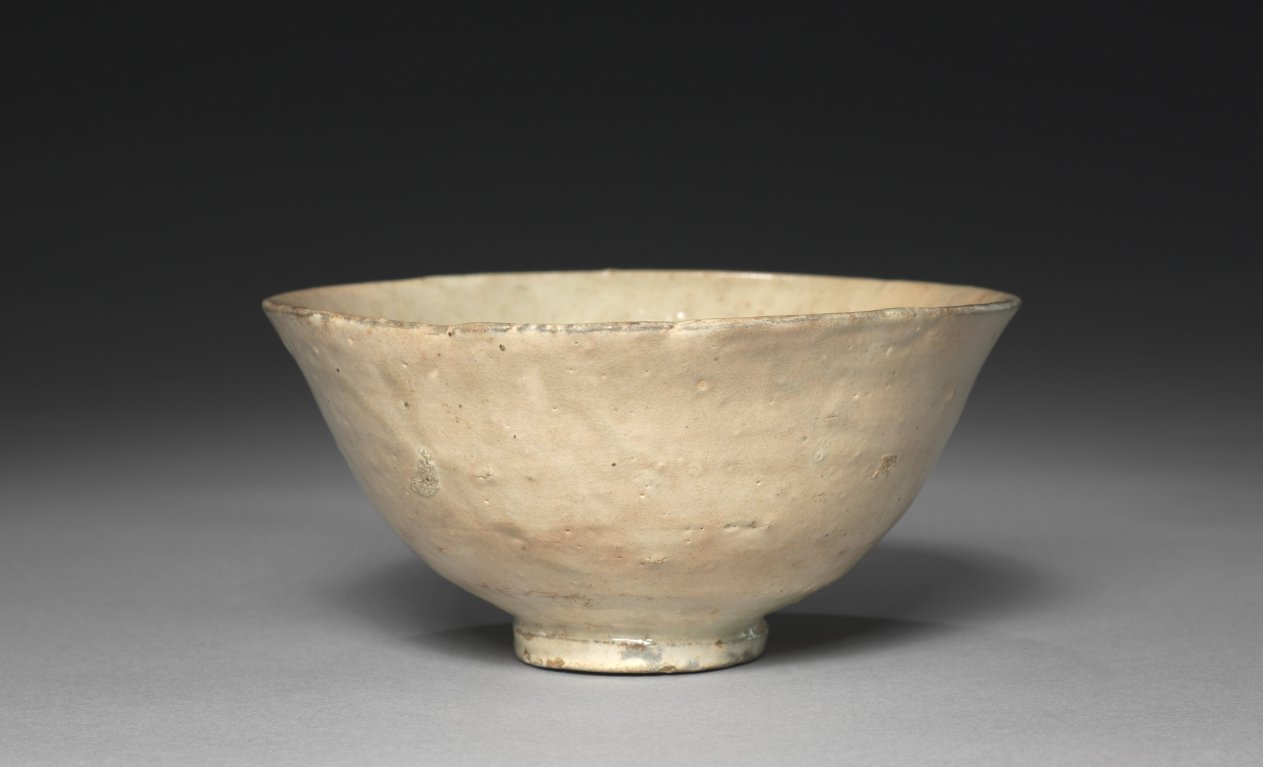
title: Tea Bowl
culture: Korea, Joseon dynasty (1392–1910)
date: 1700s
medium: stoneware with white slip and overglaze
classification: Ceramic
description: This type of wide-mouthed bowl was used every day in Korea, not exclusively for tea drinking. But when it was introduced to Japan around the early 16th century, its imperfect appearance, which evokes the aesthetics of wabi-sabi, caused it to be repurposed as a tea bowl. Korean tea bowls were circulated as a item of foreign luxury among Japanese military elites. Possibly produced in one of the kilns established by the trading office (Waegwan) in Busan, southern Gyeongsang province, this type of tea bowl was sold to Japanese tea bowl collectors. According to a historical record dated to 1641, one trading boat shipped more than 14,000 tea bowls to Japan.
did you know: This type of rustic-looking tea bowl was produced in one of the kilns established by the trading office (Waegwan) in Buan, southern Gyeongsang province, for Japanese tea bowl collectors who admired the beauty of imperfection.